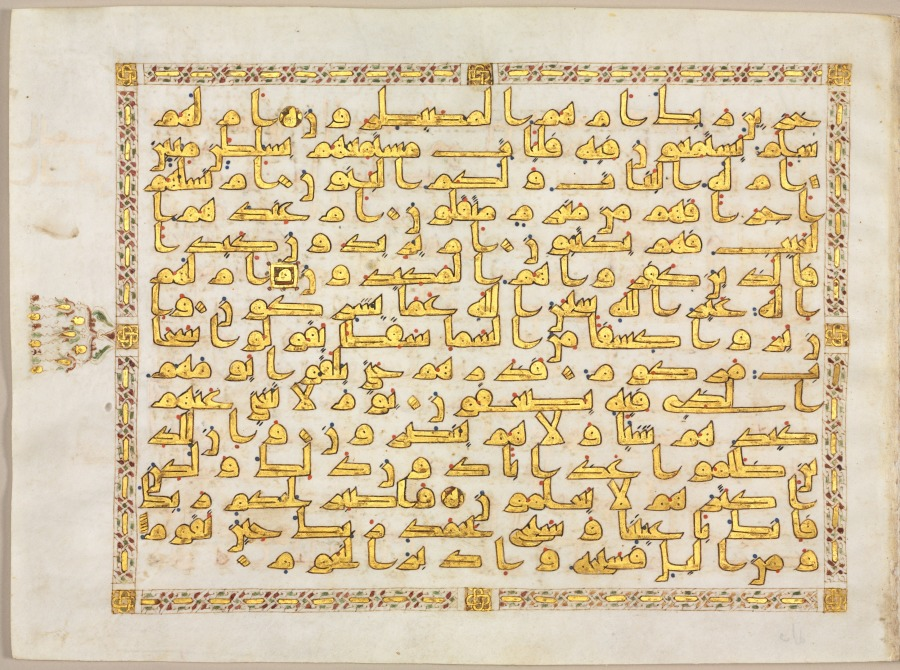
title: Folio from a Qur'an; right side of bifolio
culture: North Africa, Aghlabid or Abbasid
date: 800s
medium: gold, ink and colors on parchment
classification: Manuscript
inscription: Sura al-Tur (52: part 37-49). Script: Kufic (fifteen lines to a page)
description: Because of its connection with the Qur'an, calligraphy was elevated above all other art forms in the Islamic world. From an awkward and nearly illegible form of writing, Arabic script was transformed during the 600s and 700s to make it worthy of recording the Divine word. By the 800s, Muslim scribes were producing copies of the Qur'an that were true calligraphic masterpieces. This Qur'an, written entirely in gold, exemplifies the angular form of writing known as Kufic at its majestic best. The text on the right page is the opening of the Chapter of the Star (53:1–21), which begins: “By the star when it plunges, your comrade is not astray, neither errs, nor speaks he out of caprice. This is naught but a revelation revealed, taught him by one terrible in power, very strong. . . . ”